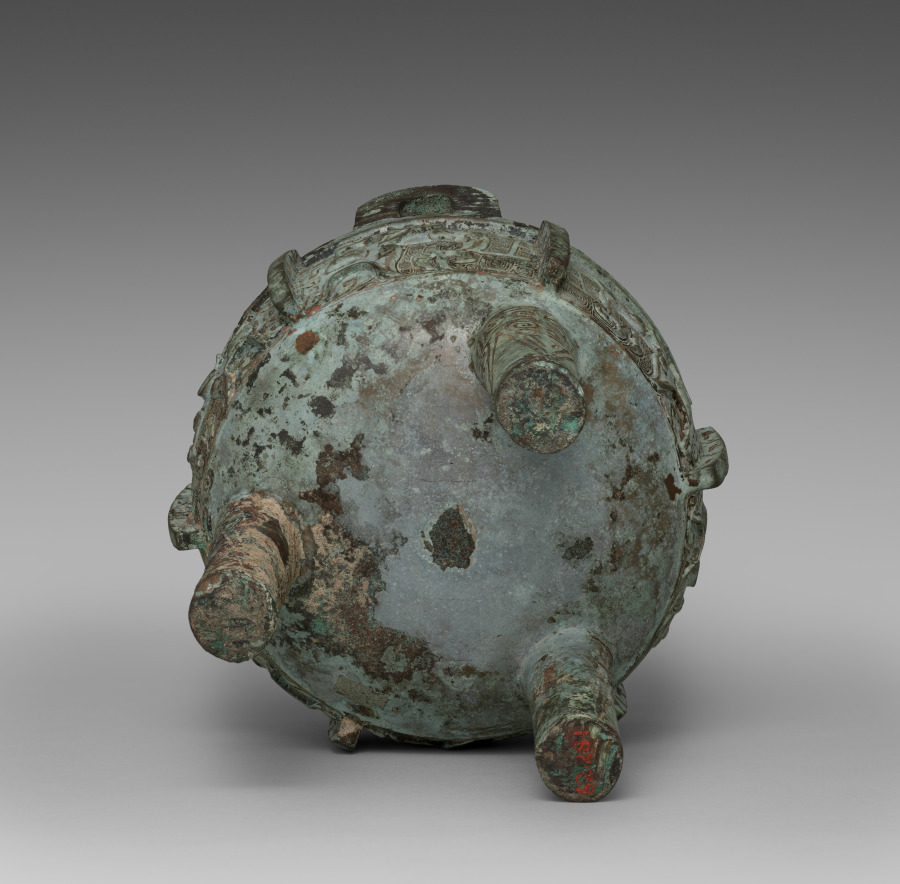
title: Tripod (Ding)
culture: China, Shang dynasty (c. 1600–c. 1046 BCE), Anyang phase (c. 1250–1046 BCE)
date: c. 1250–1046 BCE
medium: bronze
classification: Metalwork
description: Animal images in ritual bronzes served as symbolic messengers of the supernatural realms. Among others, the animal mask called taotie emerged as the most potent symbolic form. The formidable mask emanates a powerful presence with an unforgettable stare. It expresses an overwhelming feeling of mystery, representing a transcendent, supernatural concept in ancient ritual art.